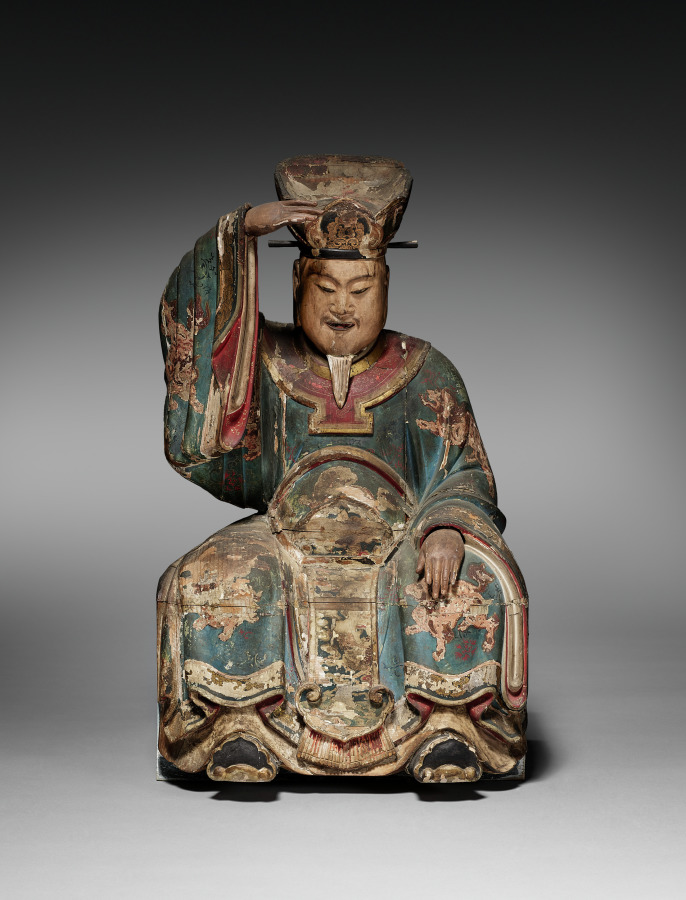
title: A King of Hell?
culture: Japan, Edo period (1615–1868)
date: c. 1800s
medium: wood, gesso, pigment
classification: Wood